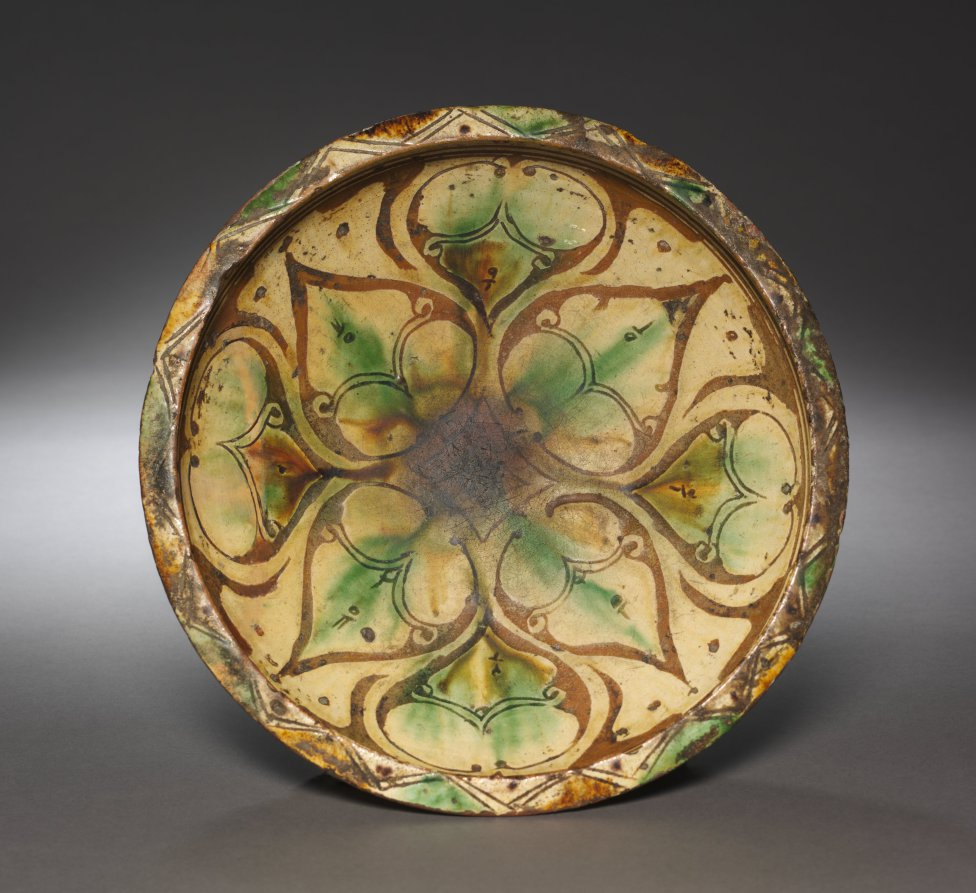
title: Bowl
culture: Northwest Iran, Aghkand (Azerbaijan area), 12th–13th century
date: 1100s–1200s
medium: earthenware with underglaze slip-painted decoration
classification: Ceramic